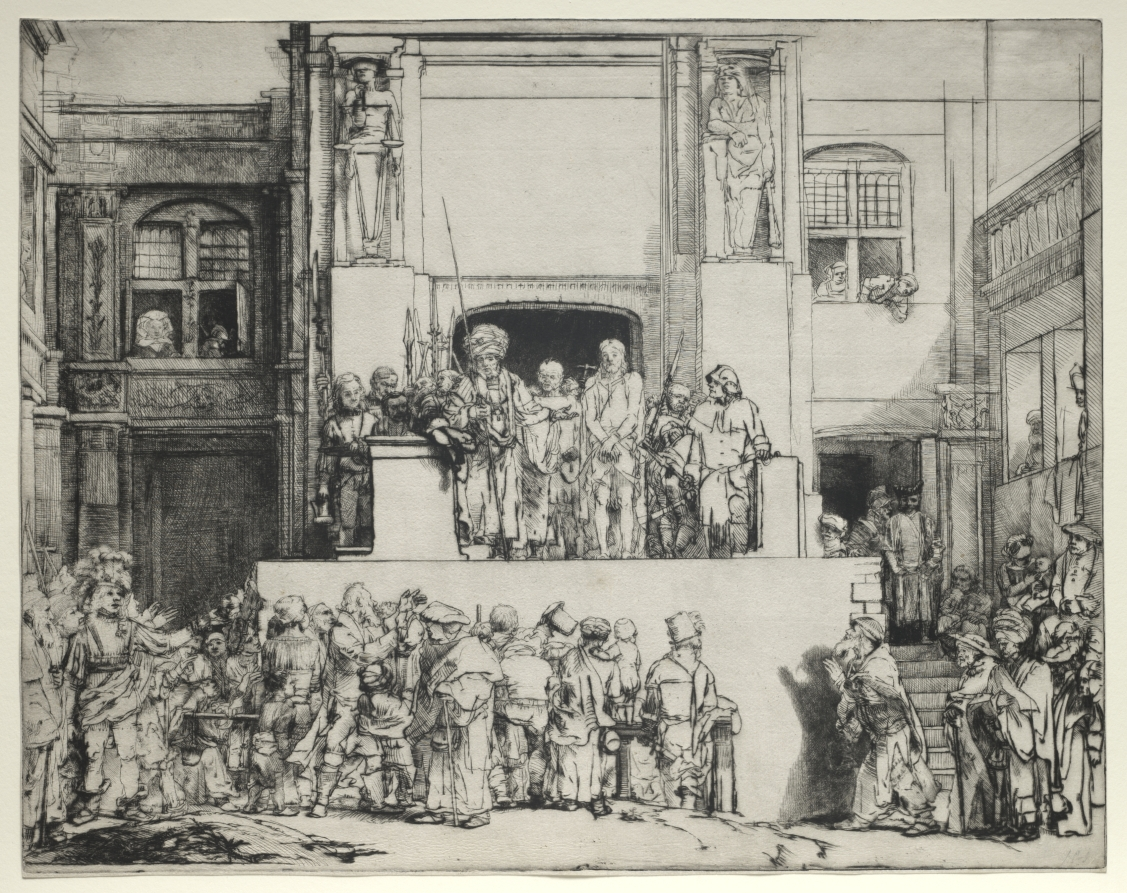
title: Ecce Homo. Christ Presented to the People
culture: Netherlands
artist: Rembrandt van Rijn (Dutch, 1606–1669)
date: 1655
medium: drypoint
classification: Print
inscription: Recto, upper left, in graphite: 79; lower left: FPS. Verso, in purple ink: Prince of Liechtenstein or Colnaghi for Liechtenstein stamp; in black ink, Zinser stamp, castle tower (rook chess piece); along side, in graphite: No. 36; along top: (illegible) name; upper left, in graphite: No 79 P(?) G (?) La Second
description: Rembrandt was an experimental and innovative printmaker and the first to execute works in pure drypoint on this monumental scale. Drypoint produces blurred lines and rich, velvety shadows, but these effects are lost as the plate wears. A limited number of rich impressions exist like this fine example of the fifth state, which demonstrates how Rembrandt redefined the expressive potential of printmaking. Rembrandt’s habit of drawing from life made him a keen observer of behavior and body language, endowing his biblical scenes with a human dimension and veracity not seen previously. The throng in Christ Presented to the People represents a cross section of the population and reflects the pictorial tradition that common humanity condemned Christ. Large areas of the imposing building, symbolizing the crushing weight and authority of the state, remain unworked so that blank white paper seems radiant in contrast to rich black shadows.